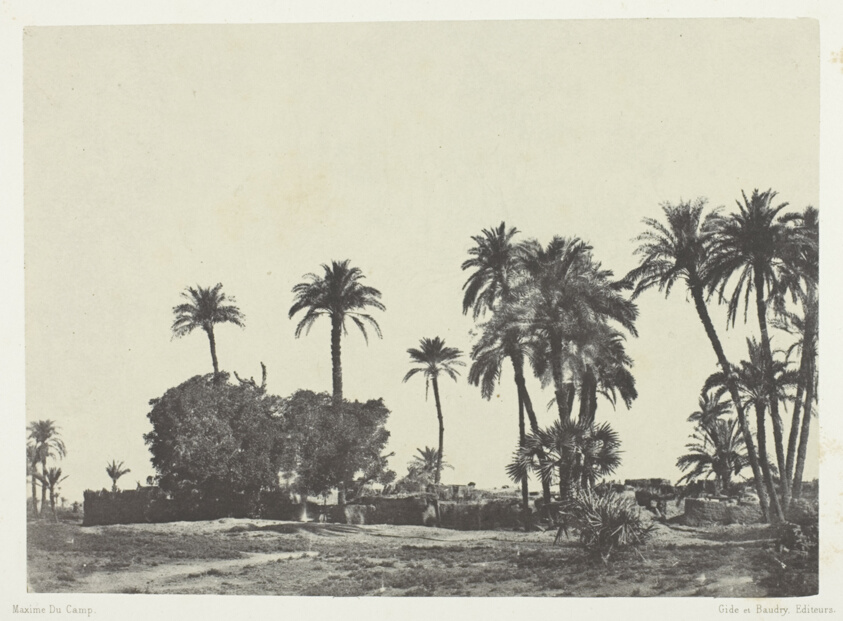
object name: Photograph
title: Village de Hamameh, Haute-Egypte, plate 21 from the album "Egypte, Nubie, Palestine et Syrie" (1852)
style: 19th century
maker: Maxime Du Camp (French, 1822–1894)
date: 1849/51, printed 1852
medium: Salted paper print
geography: France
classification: salted paper print; photographic process; photography; photograph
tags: Collected by Hugh Edwards, Egypte, Nubie, Palestine et Syrie